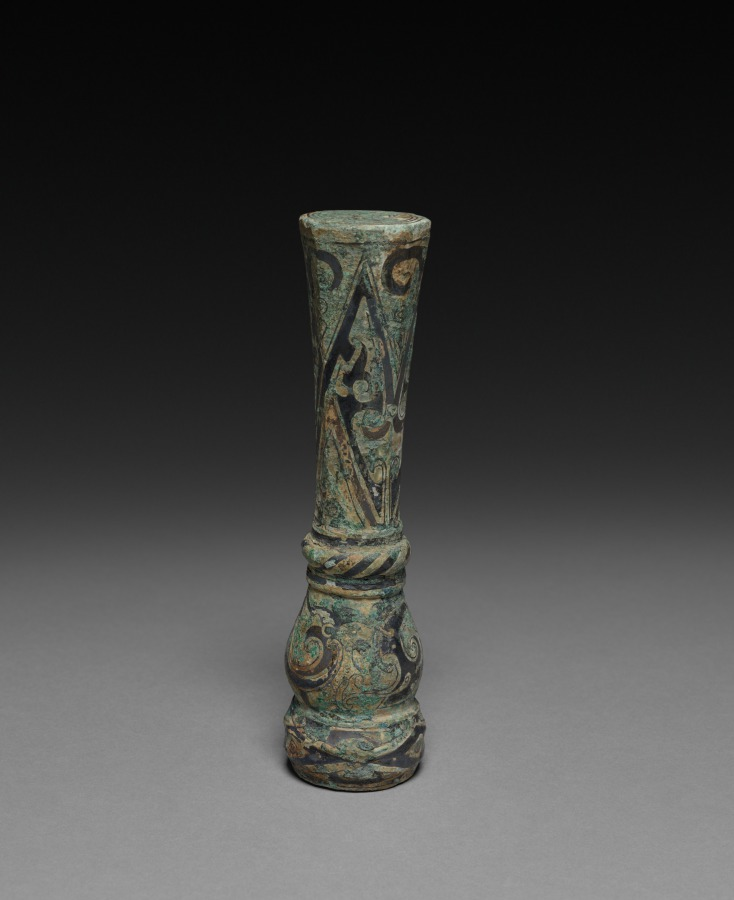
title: Shaft Mounting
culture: China, Eastern Zhou dynasty (770–256 BCE), Warring States period (475–221 BCE)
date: 500–300 BCE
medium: bronze inlaid with gold and silver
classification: Metalwork